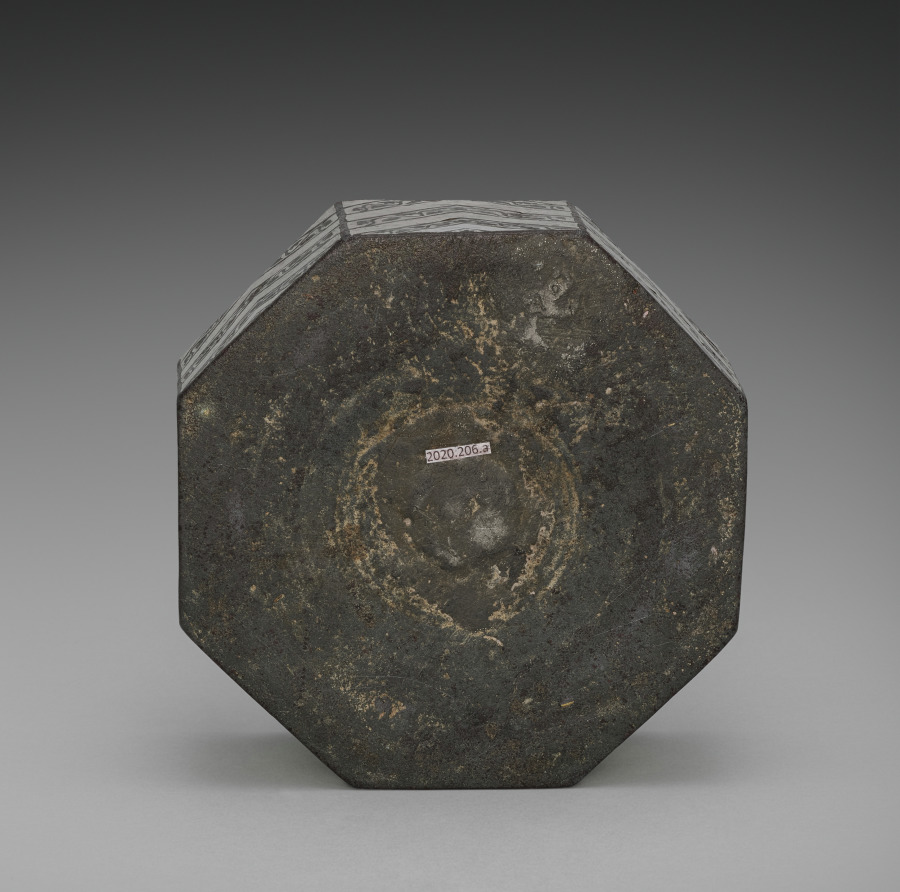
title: Bidri Pandan with Chevrons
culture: Southwestern India, Deccan, Karnataka, Bidar​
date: c. 1700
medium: Zinc alloy with silver overlay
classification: Metalwork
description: A pandan is a lidded vessel for serving paan, which has been enjoyed in India for more than two thousand years. Paan is betel or areca nut mixed with lime powder, aromatics such as clove cinnamon, or cardamom, and wrapped in betel leaf. The whole packet is chewed after a meal as a mild stimulant and mouth freshener.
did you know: The lime powder in paan functioned as an ancient antacid after meals.